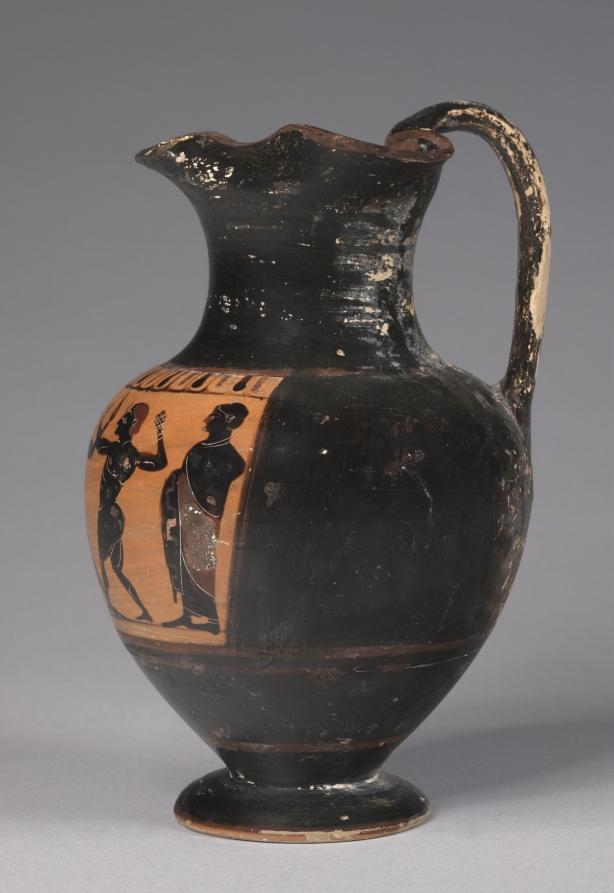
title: Black-Figure Oinochoe (Wine Jug): Boxers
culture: Greek, Attic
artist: attributed to Class of London B 524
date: c. 550–540 BCE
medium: ceramic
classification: Ceramic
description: Two stout young boxers, unbearded, face off on this small wine jug. Curiously, while one boxer has both hands wrapped for fighting (in leather straps known as himantes), the other has left one hand bare, holding it up to fend off punches. The seated figure at left, with one hand raised, may be a judge. The standing figure at right, whose white hair and beard are now mostly gone, is likely a spectator.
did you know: An ancient boxing match (or pyx) continued until one boxer could not (or would not) continue.